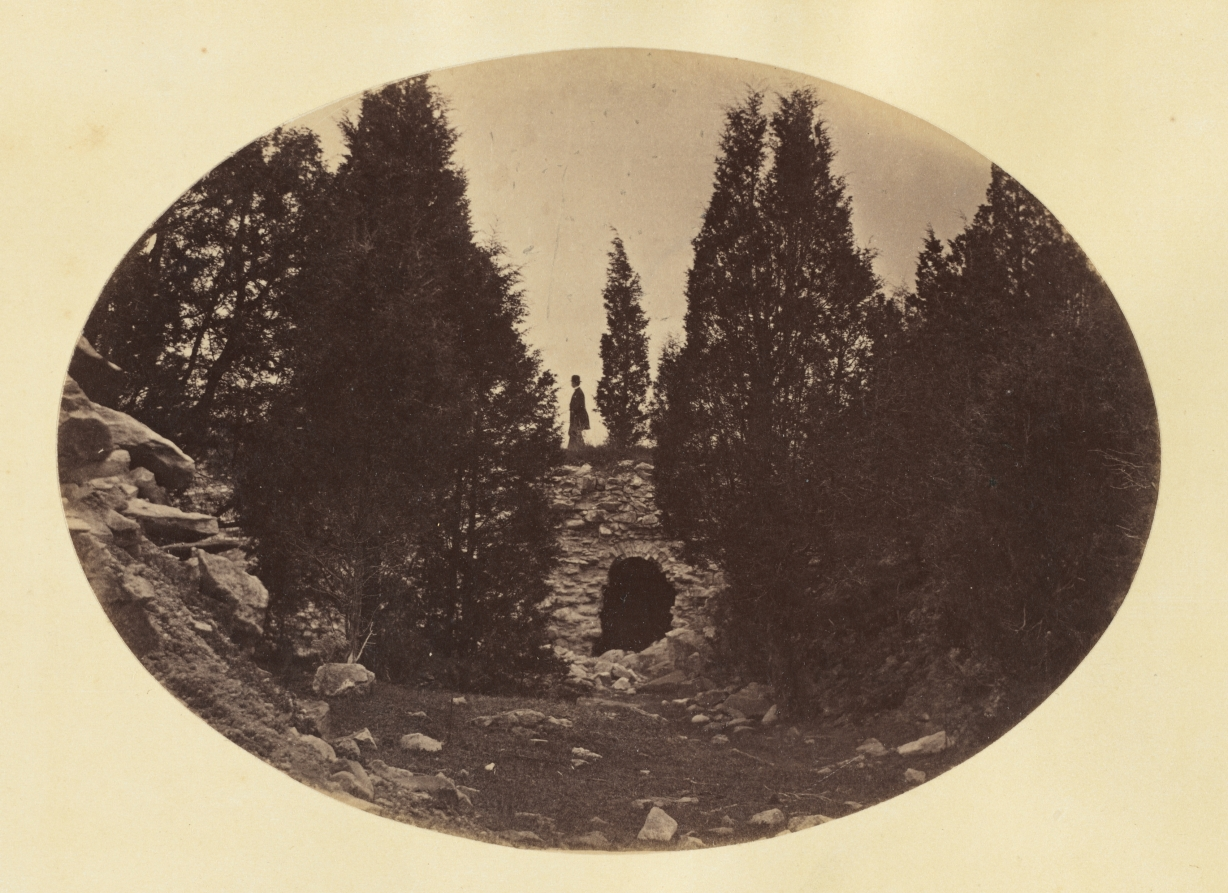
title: Old Emplacement, West Point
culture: America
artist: George K. Warren (American, 1834–1884)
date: late 1860s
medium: albumen print from wet collodion negative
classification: Photograph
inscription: printed on recto: "Warren Phot."; written in pencil: "M2074"